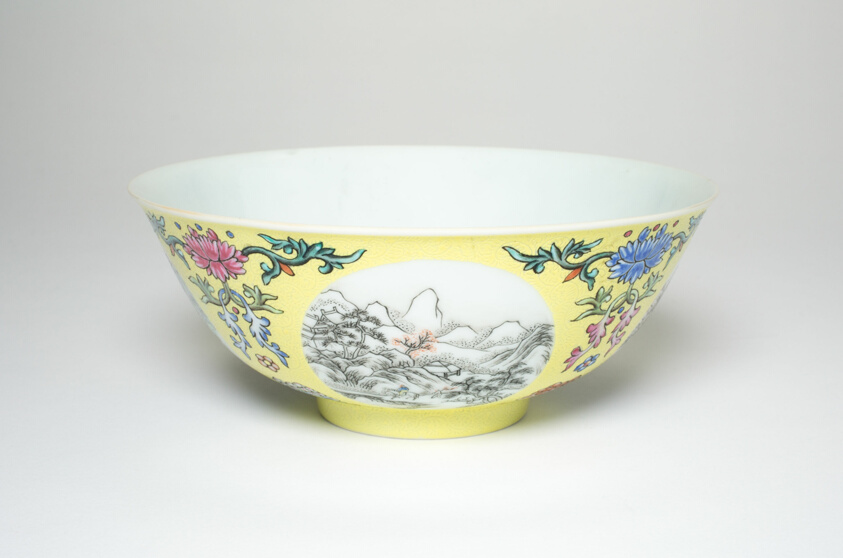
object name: Vessel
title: Bowl with Mountainous Landscapes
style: Chinese (culture or style)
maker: China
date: Qing dynasty (1644–1911), Daoguang reign mark and period (1821–1850)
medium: Porcelain painted in underglaze blue and overglaze enamels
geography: China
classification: bowl; porcelain; dish (vessel); asian art; ceramics; vessel